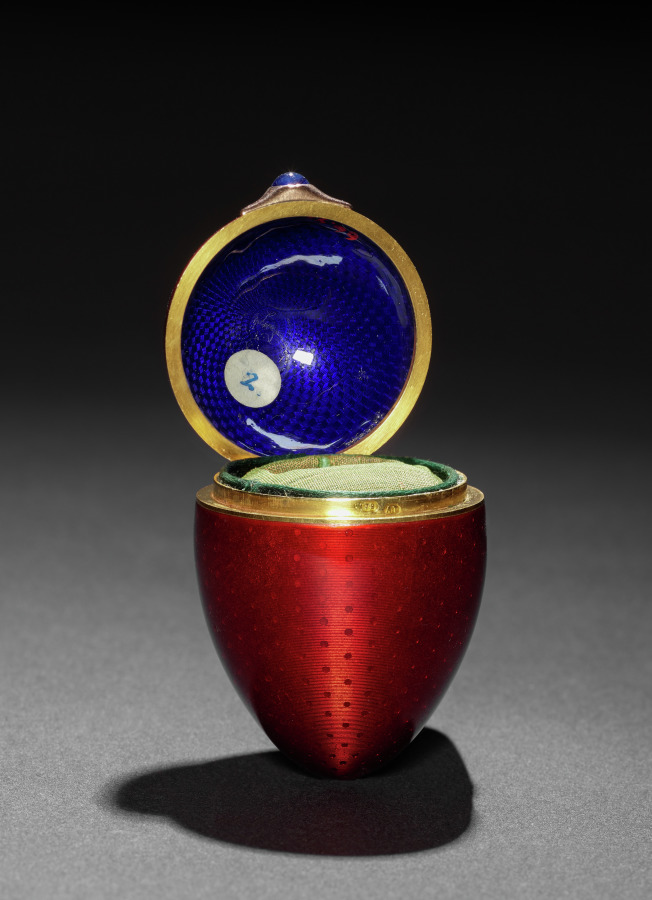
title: Egg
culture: Russia, St. Petersburg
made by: Alexander Edward Tillander (Russian, 1837–1918)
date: before 1896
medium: gold, enamel, sapphire, gold easel and stand, photograph covered with faceted green glass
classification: Miscellaneous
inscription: engraved beneath the enamel of the top are the Cyrillic letters "XB" [in monogram] which signify the phrase, "Christ is risen."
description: In the Russian Orthodox religious tradition, eggs are offered as Easter gifts to symbolize rebirth, renewal, and the resurrection of Christ. This jeweled Russian egg is engraved with XB symbolizing the phrase, “Christ is risen,” and would have been given to a lady in a wealthy household, perhaps someone of high rank within the imperial court, given the richness of materials.